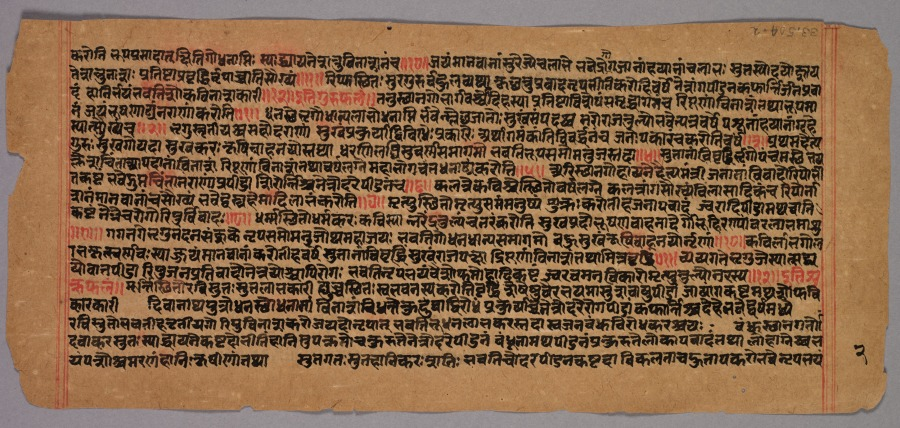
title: Page from a Jaina Manuscript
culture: India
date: 1400s–1500s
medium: ink on paper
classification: Manuscript